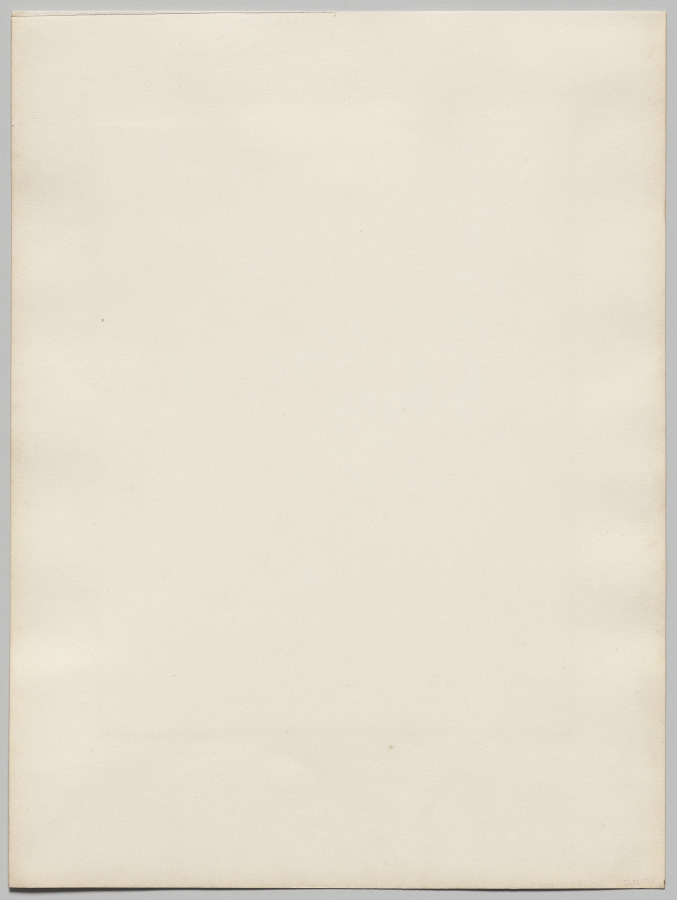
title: Louvre, Façade rue de Rivoli, Paris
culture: France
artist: Édouard Baldus (French, 1813–1889)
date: 1855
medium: albumen print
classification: Photograph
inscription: Written in ink on recto, lower right: "E. Baldus"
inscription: Written in ink on recto: "14"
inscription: Written in pencil on recto: "Rue de Rivoli Le Louvre"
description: Baldus took up photography in the 1840s and became renowned for his architectural views. In 1854, he was commissioned to record construction of the New Louvre, Emperor Napoleon III’s project to build wings that would join the Louvre and Tuileries Palaces and create a vast courtyard. You can enter that courtyard through the arch hidden from view here between the pairs of columns, where you will find the glass pyramid designed by I.M. Pei and completed in 1988.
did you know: Like many early photographers, Edouard Baldus began as a painter.